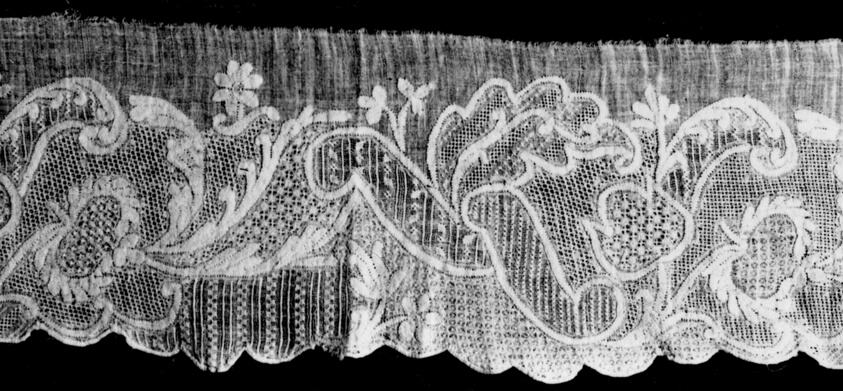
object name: Textile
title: Edge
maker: France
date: 19th century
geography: France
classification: textile; needlework (visual works)